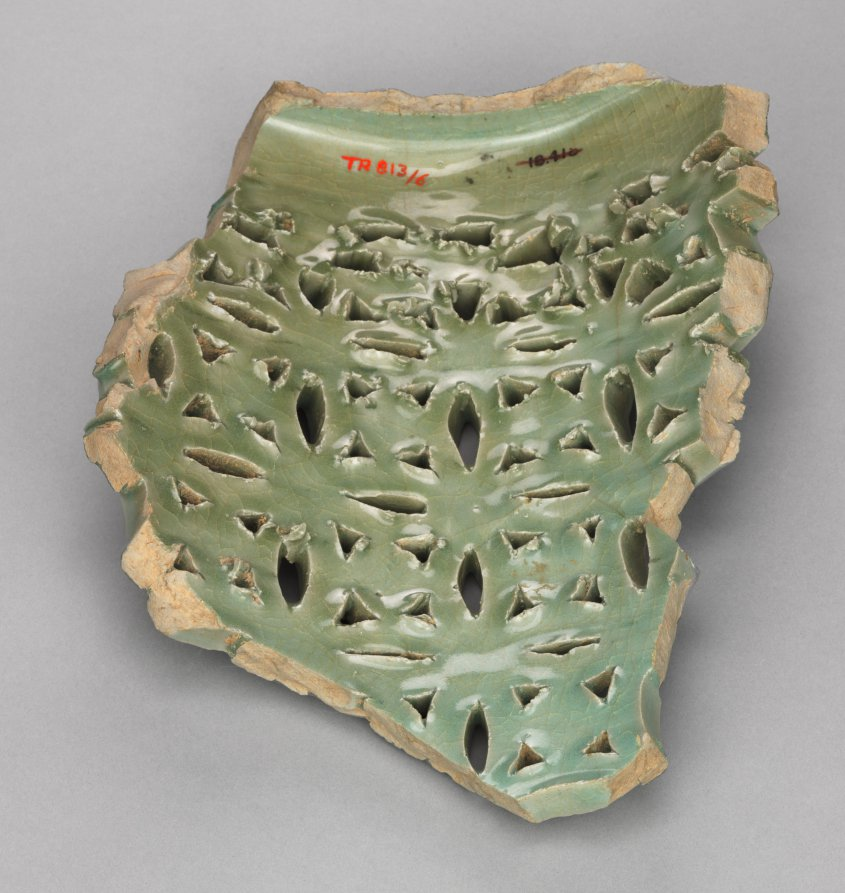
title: Fragment of Garden Stool with Openwork Design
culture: Korea, Goryeo dynasty (918–1392)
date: 1200s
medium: stoneware with celadon glaze, insiced scroll design, and carved openwork pattern with floral centers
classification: Ceramic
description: This ceramic fragment was part of a luxurious outdoor stool possibly used in a Goryeo elite's garden. A similar example, which maintains its pristine condition, can be found in collection of the National Museum of Korea. https://www.museum.go.kr/site/main/relic/search/view?relicId=7126.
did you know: This ceramic fragment was part of a luxurious outdoor stool. A similar example can be found in collection of the National Museum of Korea. https://www.museum.go.kr/site/main/relic/search/view?relicId=7126